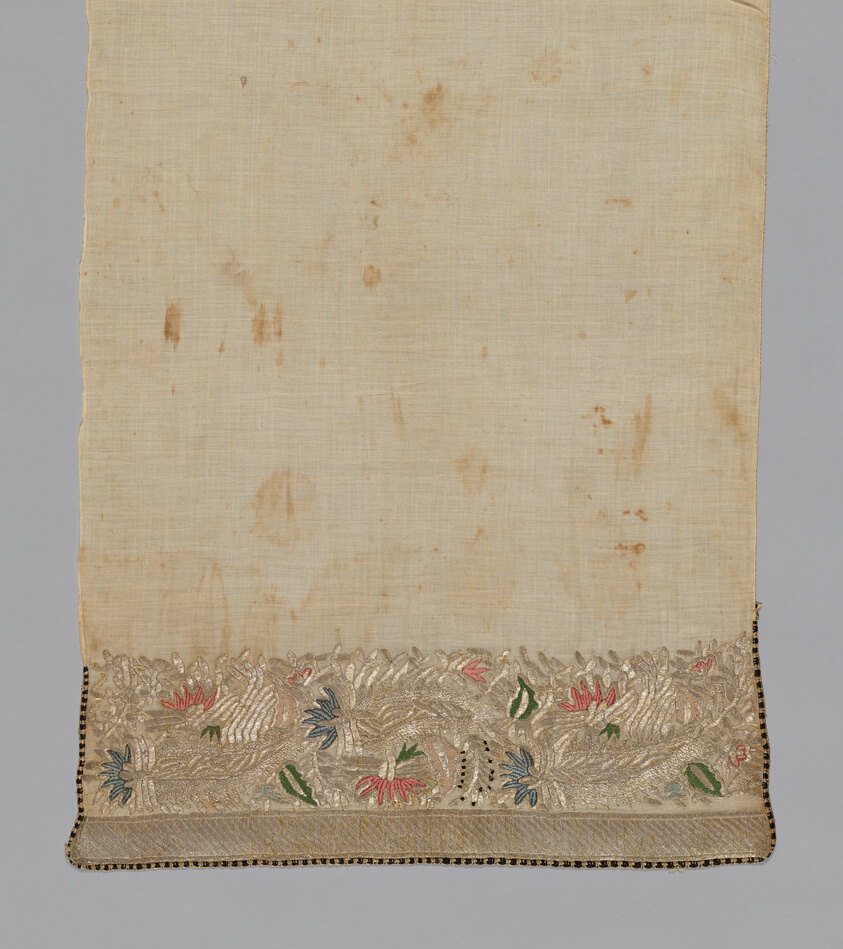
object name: Textile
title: Towel or Napkin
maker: Turkey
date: 19th century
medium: embroidered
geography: Turkey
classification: textile; needlework (visual works); weaving